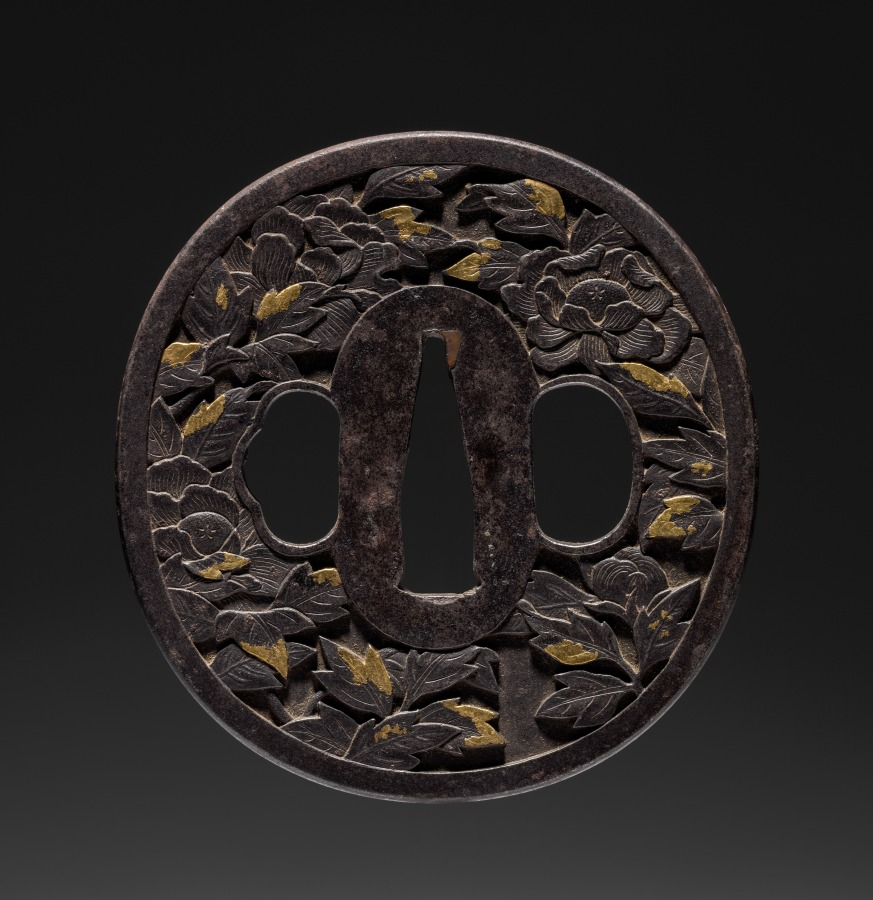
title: Sword Guard (Tsuba) with Peonies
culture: Japan, Edo period (1615–1868)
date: early 1800s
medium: iron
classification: Arms and Armor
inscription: signed: 因州住直充